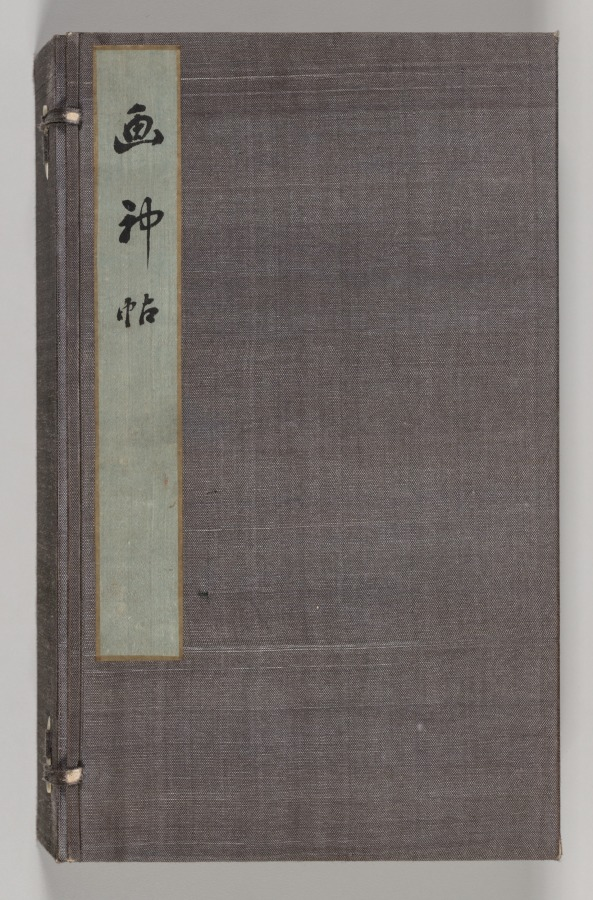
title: Reverberations of Taiga (Volume 1)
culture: Japan, Edo period (1615–1868)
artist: Aoki Shukuya (Japanese, d. 1802)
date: mid- to late 1700s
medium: One of a pair of albums; ink, or ink and light color on paper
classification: Portfolio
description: Traditionally, young painters in Japan began their studies with an established master-painter. The master's compositions invariably became models that the apprentice copied to learn various ink and brush techniques. Shukuya was a pupil of the famous Kyoto artist Ikeno Taiga, whose style is reflected in these sketches of rocks, trees, and mountains.